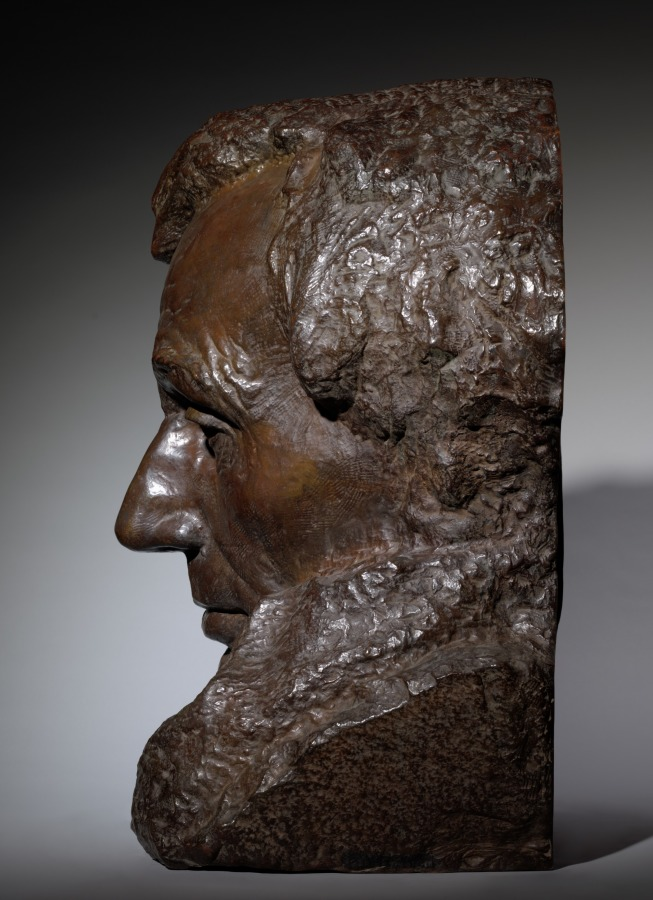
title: Head of Lincoln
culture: America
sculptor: Gutzon Borglum (American, 1867–1941)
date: 1908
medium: bronze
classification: Sculpture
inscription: Signed and dated on left of base: "Gutzon Borglum, 1908"